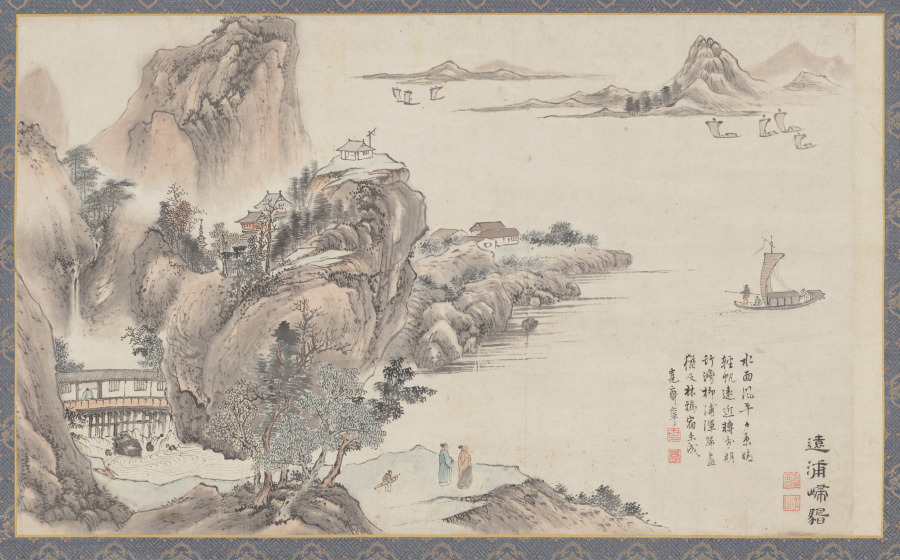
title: Returning Sails off a Distant Shores, from Eight Views of Xiao-Xiang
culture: Japan, Edo period (1615–1868)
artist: Tani Bunchō (Japanese, 1763–1841)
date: 1788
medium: album leaf remounted as a hanging scroll; ink and color on paper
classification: Painting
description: This painting was part of a set of album leaves representing the Eight Views of Xiao-Xiang, a theme originating in Chinese poetry and painting that spread to both Korea and Japan. Southern China’s Xiao-Xiang area, where the mist-covered banks of the Xiang River created a complex landscape shifting like the moods and minds of people, captured the imaginations of generations of painters and calligraphers. Inscriptions on these works suggest that they were possibly ordered by newly prominent Japanese Confucian scholars.